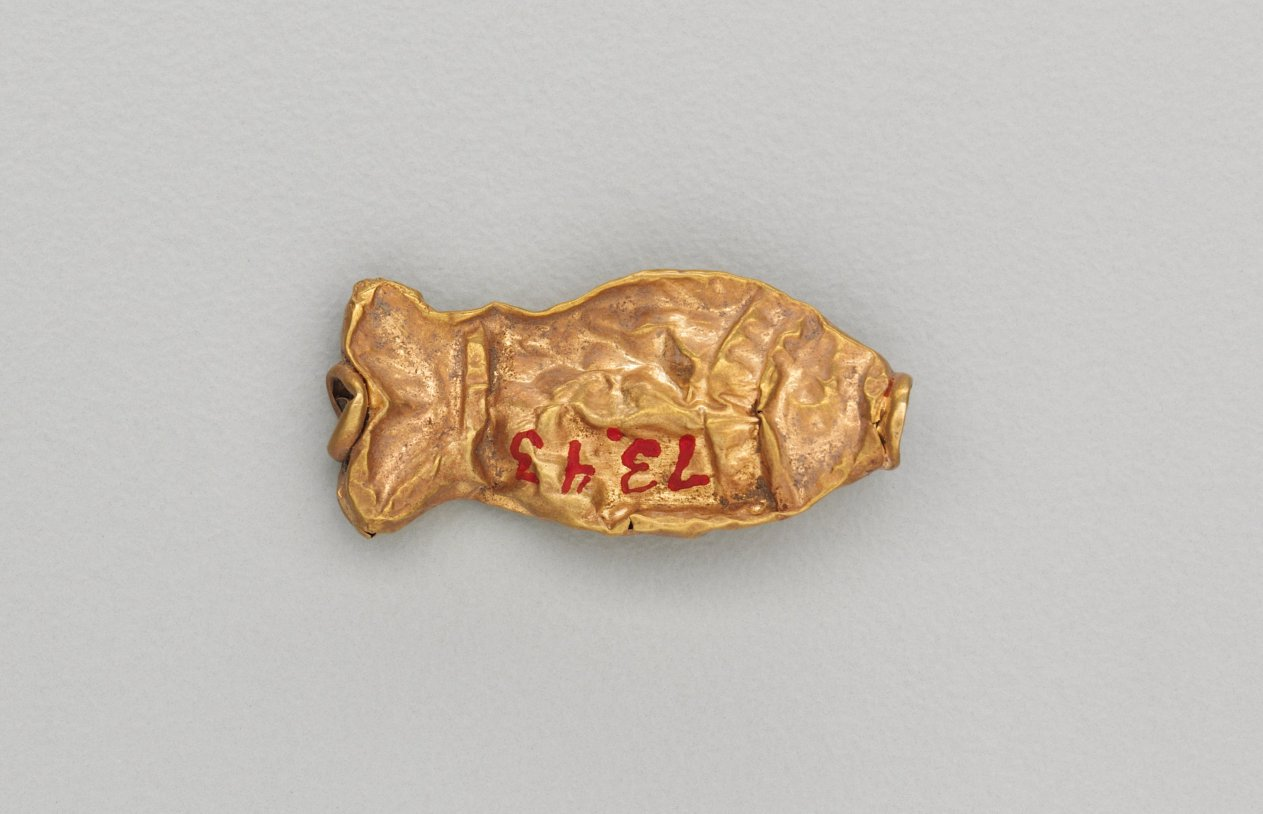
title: Necklace Bead in the Form of a Fish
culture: India, Shunga period (185–78 BCE)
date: 185–72 BCE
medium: gold repoussé with granulation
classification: Jewelry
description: Jewelry in ancient India often consisted of elements associated with water, such as fish and other aquatic plants and animals. Since water is essential for life, imagery that connotes water is life-affirming, or auspicious, and therefore appropriate adornment.